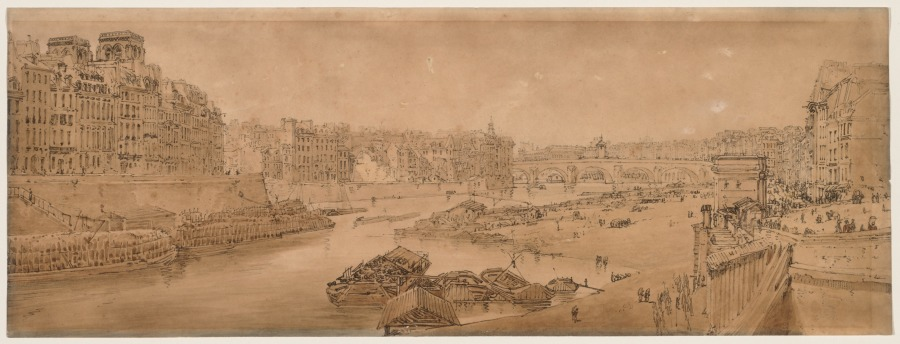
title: A Selection of Twenty of the Most Picturesque Views in Paris: View of the City with the Louvre taken from the Pont Marie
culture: England, early 19th Century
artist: Thomas Girtin (British, 1775–1802)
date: 1802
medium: soft-ground etching with bistre wash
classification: Print